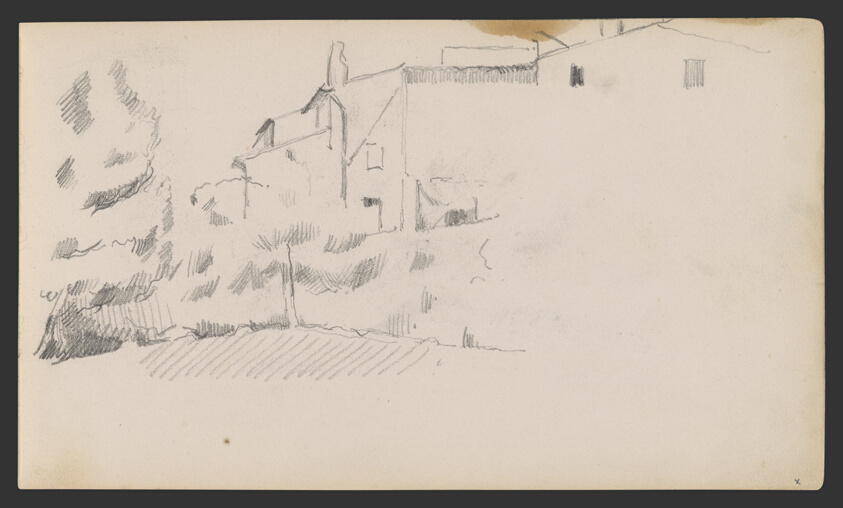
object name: Drawing and Watercolor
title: Sketchbook No. 2 (L'Estaque)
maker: Paul Cézanne; French, 1839-1906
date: 1875–86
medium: Graphite and pen and ink drawings on paper, bound into a book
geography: France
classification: sketchbook; graphite; prints and drawing; paper